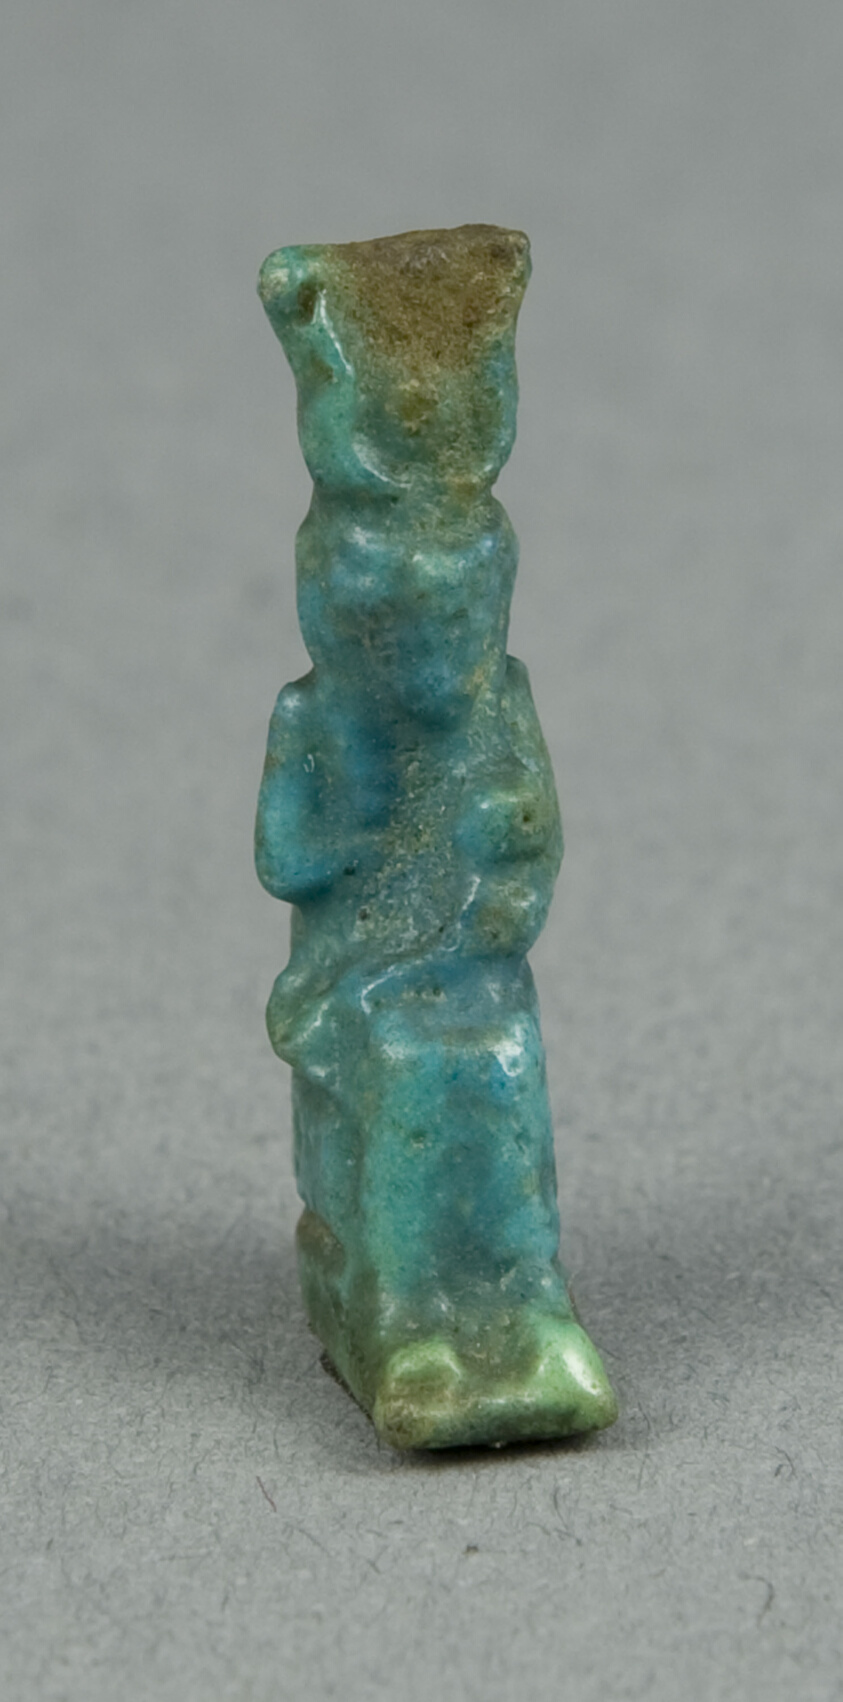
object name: Costume and Accessories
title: Amulet of the Goddess Isis with Horus as a Child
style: late period (egyptian), egyptian, ancient, ptolemaic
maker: Egyptian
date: Late Period–Ptolemaic Period (7th–1st centuries BCE)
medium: Faience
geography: Egypt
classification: amulet; jewelry; ceramics; ancient art; costume; faïence (composite material)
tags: goddesses, crowns, gods (deities), mothers, nursing (breast feeding), sons